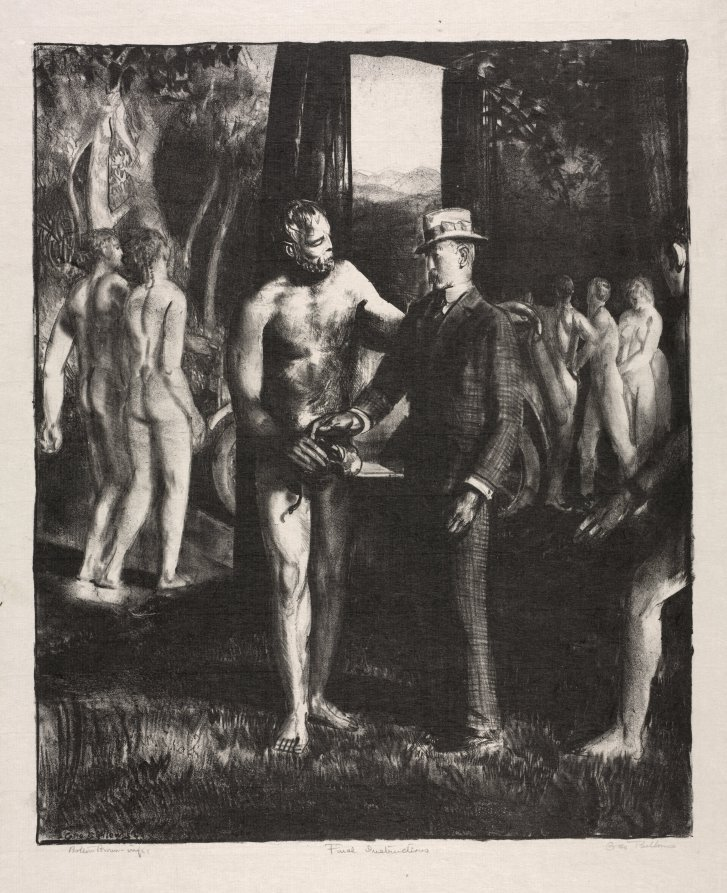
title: Final Instructions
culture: America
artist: George Bellows (American, 1882–1925)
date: 1923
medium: lithograph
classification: Print